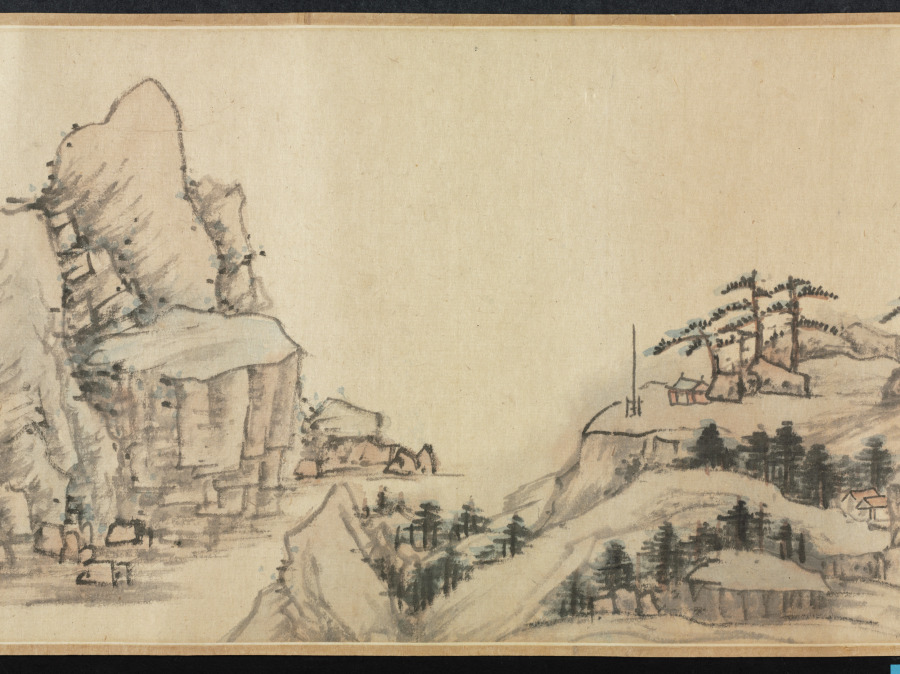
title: Dream Journey among Rivers and Mountains, no. 90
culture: China, Qing dynasty (1644-1911)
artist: Cheng Zhengkui (Chinese, 1604–1676)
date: 1658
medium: Handscroll; ink and color on paper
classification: Painting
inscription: 江山臥遊圖其九十, 青溪道人, 戊戌夏五。 [印] 程正揆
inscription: Title and inscription by Huang Yi 黃易 (1744–1802), and 3 seals.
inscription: 1 colophon and 9 additional seals: 3 seals of Dai Zhi 戴植 (active about 1821–1850); 1 colophon, dated 1914, and 3 seals of Yan Shiqing 顏世清 (1873–1929); 3 seals of Wang Nanping 王南屏 (1924–1985).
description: Cliffs and waterfalls interspersed with trees and dotted vegetation are spread over this handscroll. Long paths wind their way through villages, beside cottages, shrines, and over bridges. In the past, Chinese literati officials liked to take a “dream journey” along mountains and rivers when viewing landscape paintings in their studios. Scenery of this kind thus became a way to escape from the world of bureaucracy and administration. The painter Cheng Zhengkui used the title “Dream Journey” for a whole series of paintings, of which this is number 90. He is said to have painted 500 of them, but the actual count remains unknown.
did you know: Cheng Zhengkui planned to make 100 dream journey paintings but may have ultimately made 500.